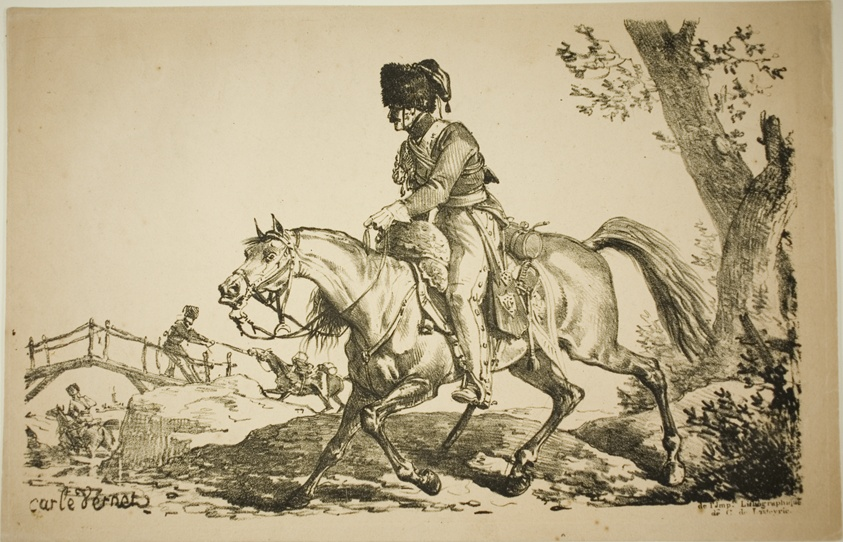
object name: Print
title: Artilleryman on Horseback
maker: Carle Vernet (French, 1758-1836); printed by Comte Charles Philibert de Lasteyrie (French, 1759-1849)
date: 1817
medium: Lithograph in black on tan wove paper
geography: France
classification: lithograph; print; prints and drawing